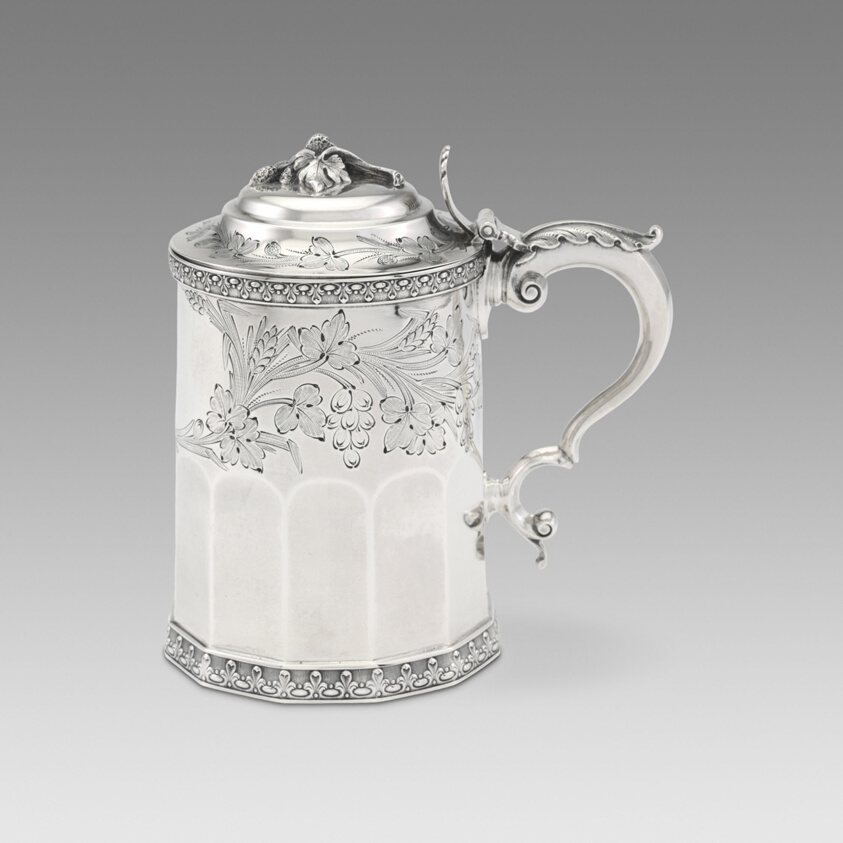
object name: Metalwork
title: Tankard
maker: Kidney & Johnson; American, active 1868–c. 1874; New York; Edmund Kidney (1821–1875); Samuel H. Johnson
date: c. 1868–74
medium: Silver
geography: New York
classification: drinking vessel; silver; american decorative arts; american arts; decorative arts